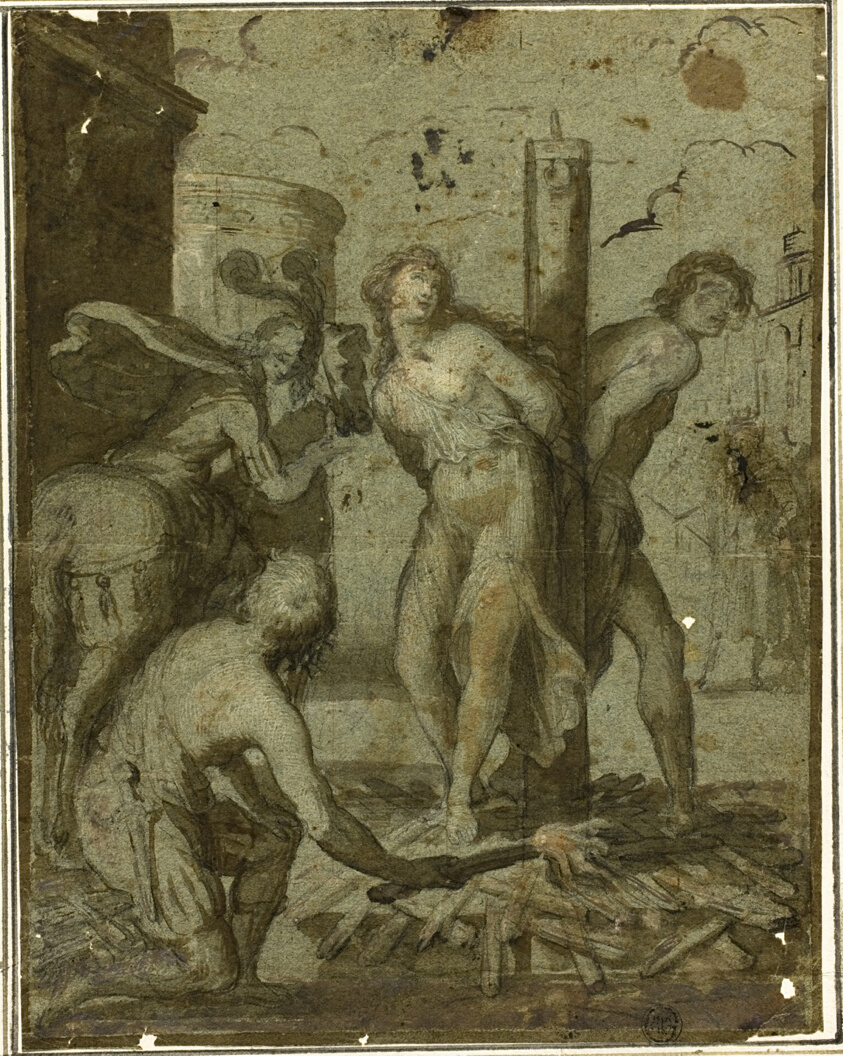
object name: Drawing and Watercolor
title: Clorinda Rescues Olindo and Sophronia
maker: Unknwon artist; Italian, 17th century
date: 1600s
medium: Brush and brown wash, heightened with lead white (partially oxidized) and pink gouache, over black chalk, on blue laid paper, laid down on ivory laid paper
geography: Italy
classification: ink or chalk wash; drawings (visual works); prints and drawing